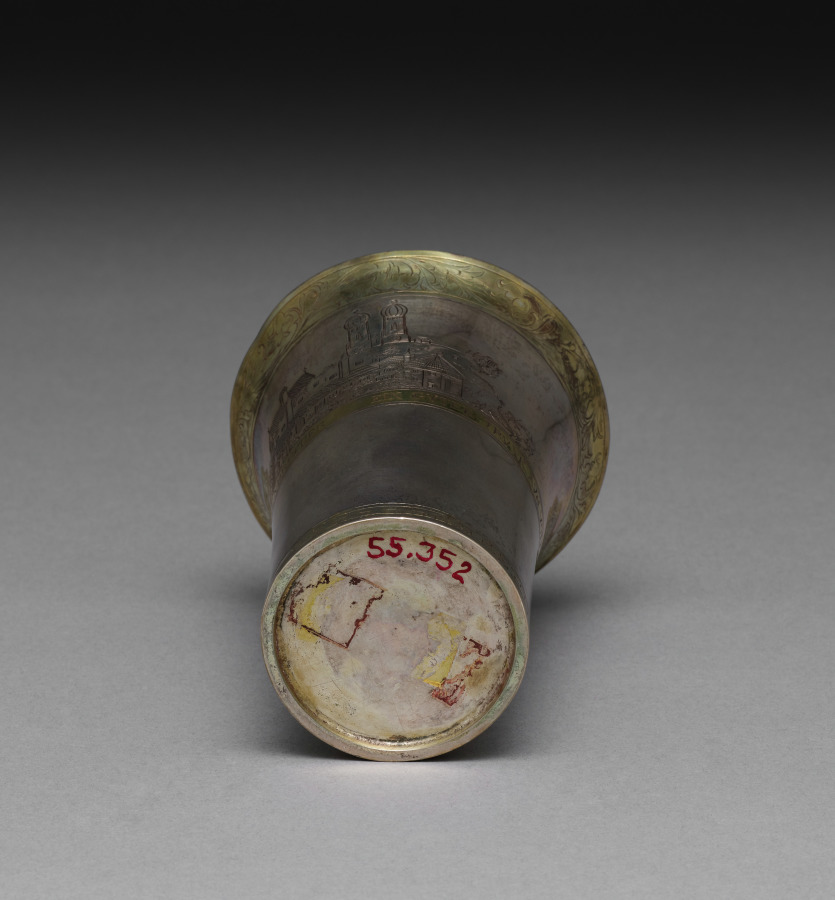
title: Beaker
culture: Germany, Munich, mid-18th century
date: mid 1700s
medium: silver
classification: Silver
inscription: Engraved around side: "EIN GVTER TRVNK AUS VOLLEM BECHER -- DAS IST DER BESTE SORGENBRECHER."